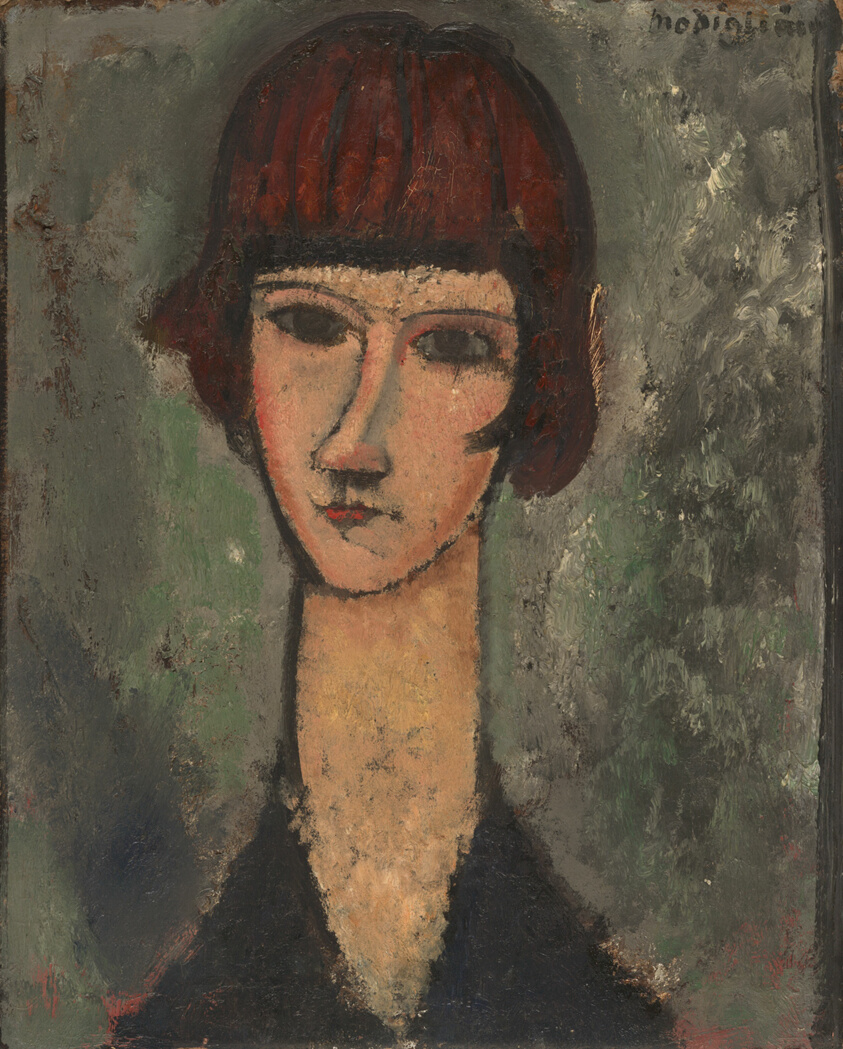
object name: Painting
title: Portrait of a Woman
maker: Amedeo Modigliani (Italian, 1884-1920)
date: c. 1917/19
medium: Oil on cardboard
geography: Italy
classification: painting; modern and contemporary art